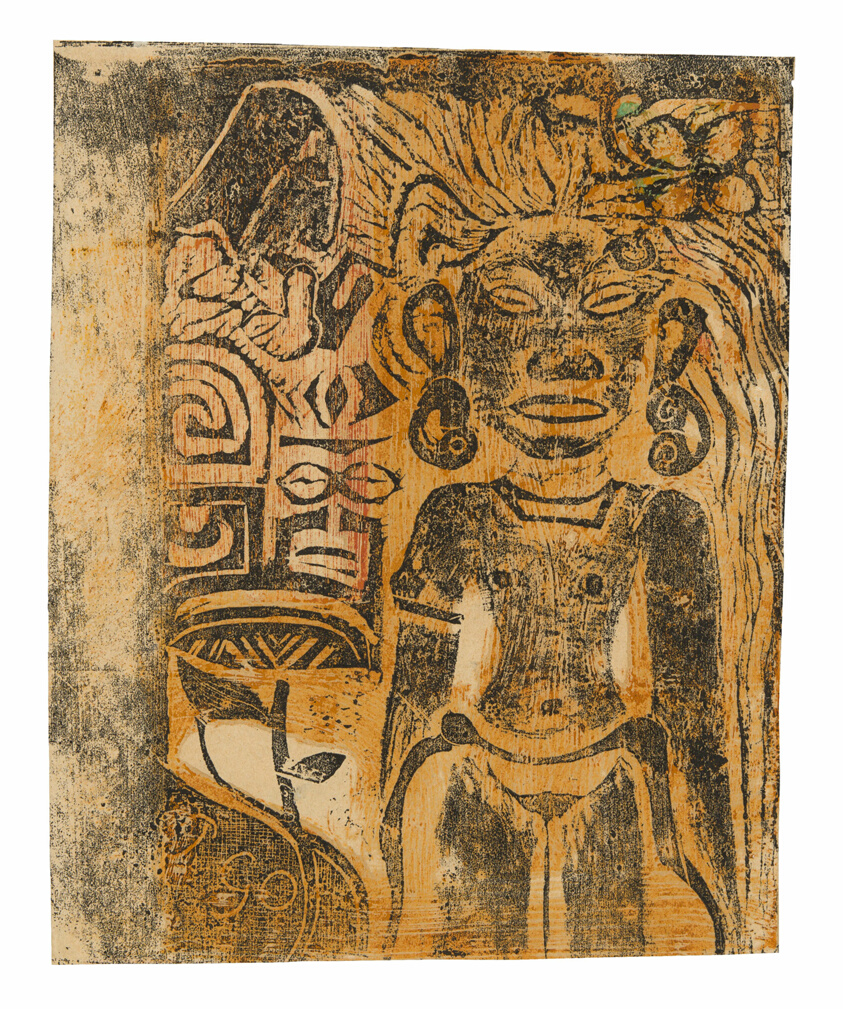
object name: Print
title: Tahitian Idol—the Goddess Hina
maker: Paul Gauguin (French, 1848-1903)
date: 1894/95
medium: Wood-block print in black ink, over brush and solvent thinned and selectively applied ocher, reddish-orange and touches of green wax-and-resin-based media, on cream wove paper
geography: France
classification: woodcut; print; prints and drawing